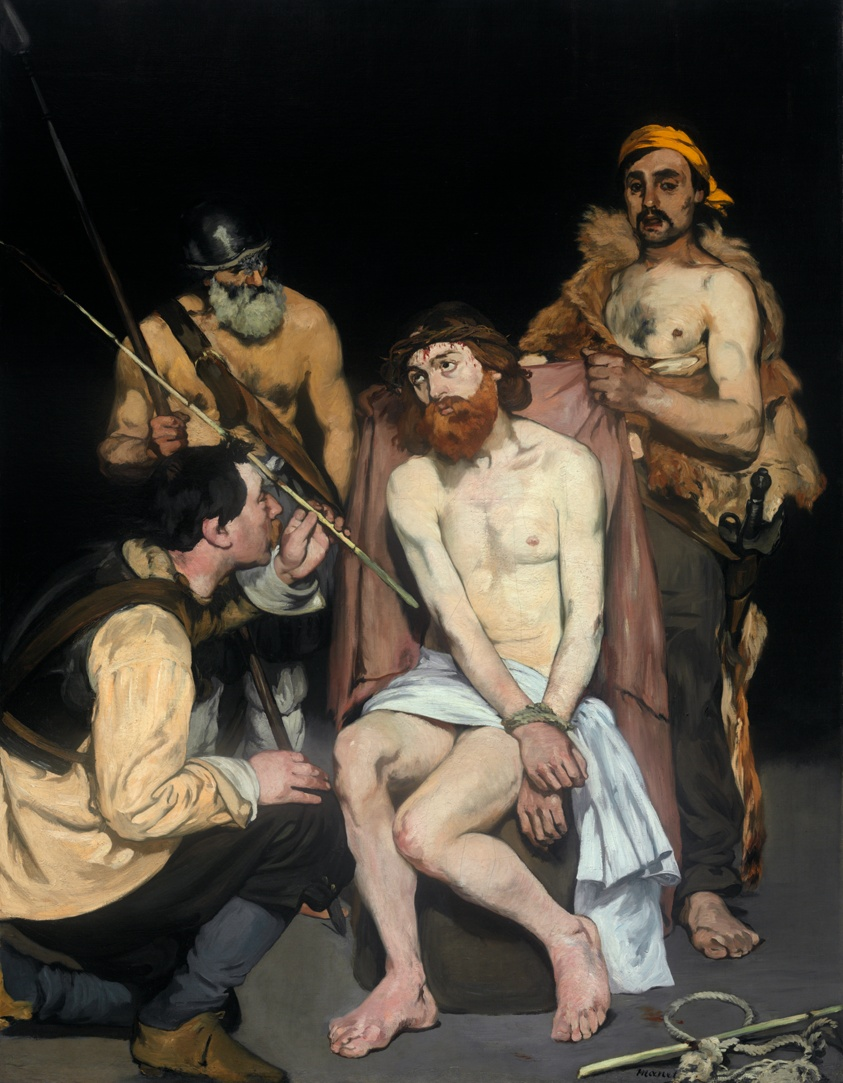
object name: Painting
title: Jesus Mocked by the Soldiers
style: Realism, nineteenth century, 19th century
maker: Édouard Manet (French, 1832–1883)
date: 1865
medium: Oil on canvas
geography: France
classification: painting; european painting; paint; oil paintings (visual works); oil on canvas; french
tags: Christian subjects, weapons, soldiers, religious figures, Jesus, Christianity, emotions, religious scenes, men, religion, Century of Progress, world's fairs, Chicago World's Fairs, blood, crowns, Narrative